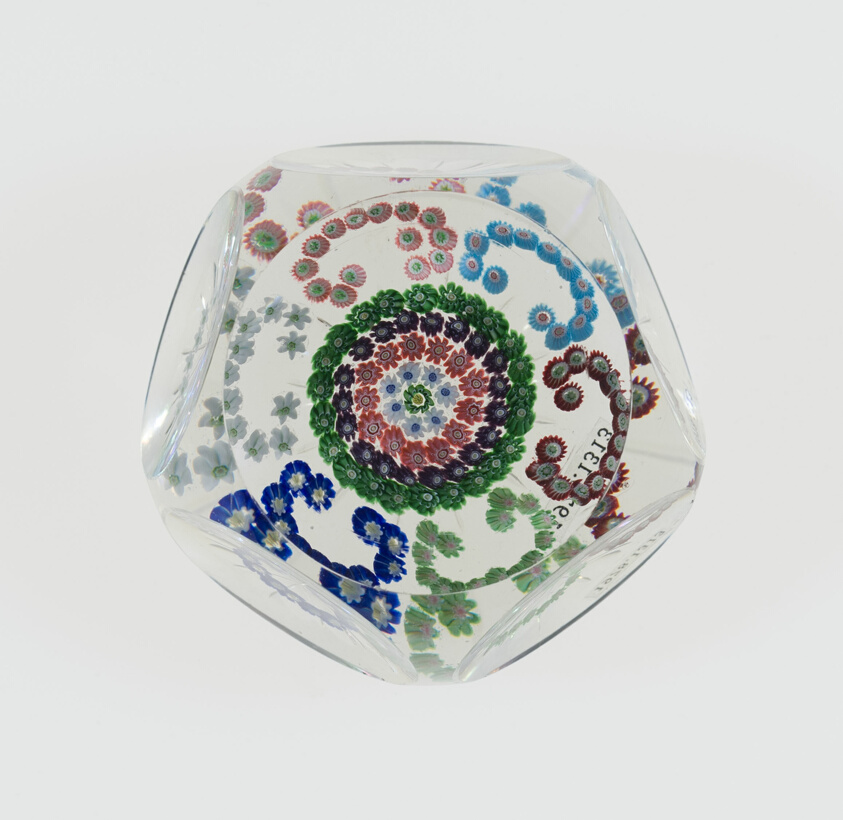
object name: Glass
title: Paperweight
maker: Clichy Glassworks (Cristalleries de Clichy); Clichy, France, 1837-1885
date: 19th century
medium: Glass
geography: Clichy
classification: paperweight; millefiori; european decorative arts; glass